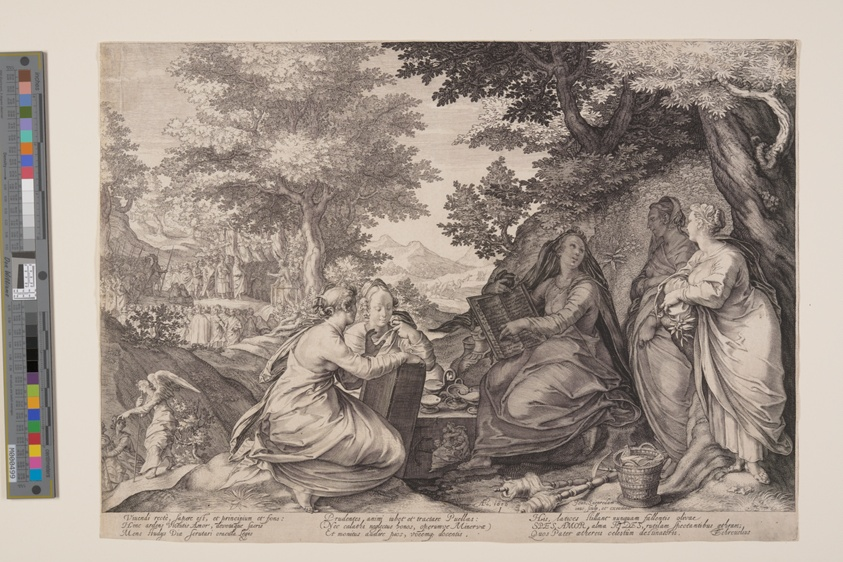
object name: Print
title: Wise Virgins Gathered Together in a Landscape Before the Preaching of the Baptist, from Parable of the Wise and Foolish Virgins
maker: Jan Saenredam (Dutch, 1565–1607)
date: 1606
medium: Engraving on ivory laid paper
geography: Netherlands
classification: engraving; paper; print; prints and drawing